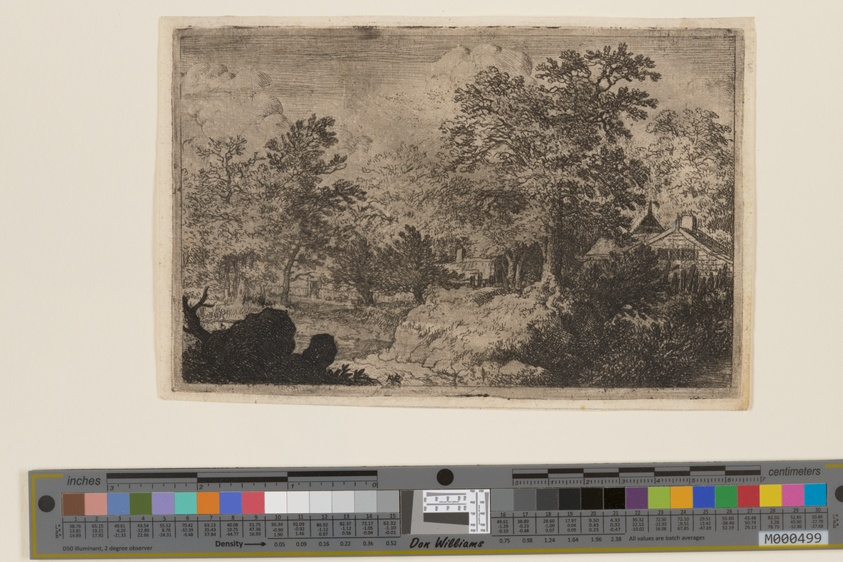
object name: Print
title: The Oak on the Hill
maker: Allaert van Everdingen (Dutch, 1621–1675)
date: c. 1640-1670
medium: Etching and plate tone on ivory laid paper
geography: Netherlands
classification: etching; paper; print; prints and drawing